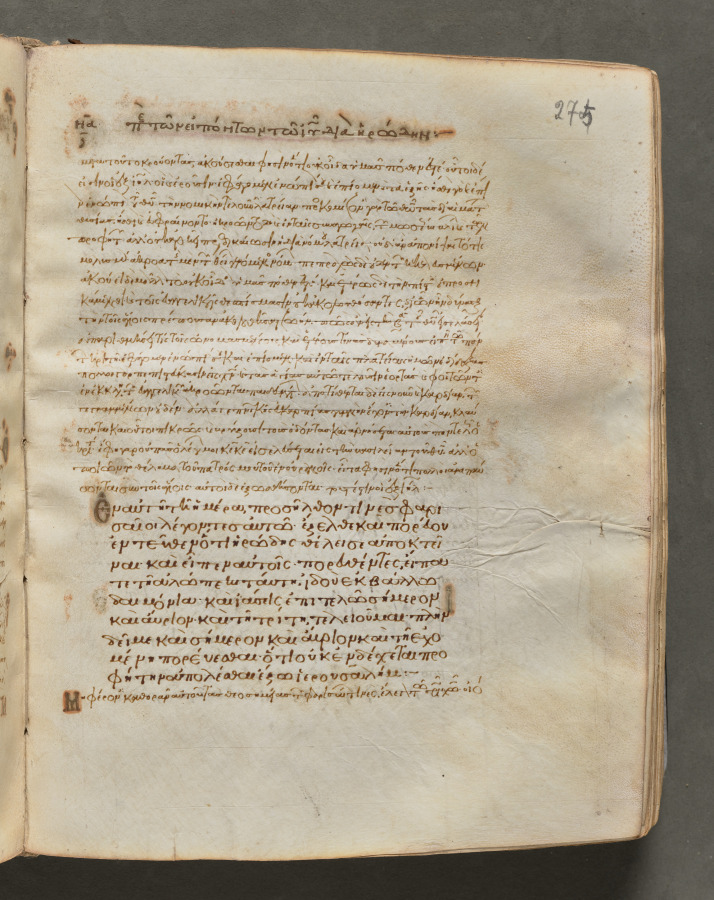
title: Text, folio 275 (recto), from a Gospel Book with Commentaries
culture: Byzantium, Constantinople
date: c. 1000–1100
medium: ink, tempera, and gold on vellum; leather binding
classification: Bound Volume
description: Each of the four gospels in this book opens on a page with brilliantly illuminated borders depicting the author of the text as well as birds—principally peacocks, symbols of the immortality of the soul—and fountains, representing the fountain of life and the salvation of the soul. This volume consists of 428 leaves with texts in Greek. Its level of sophistication suggests that it was probably written and decorated in a monastery in Constantinople.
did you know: Gospel books were carried in procession through Byzantine churches.